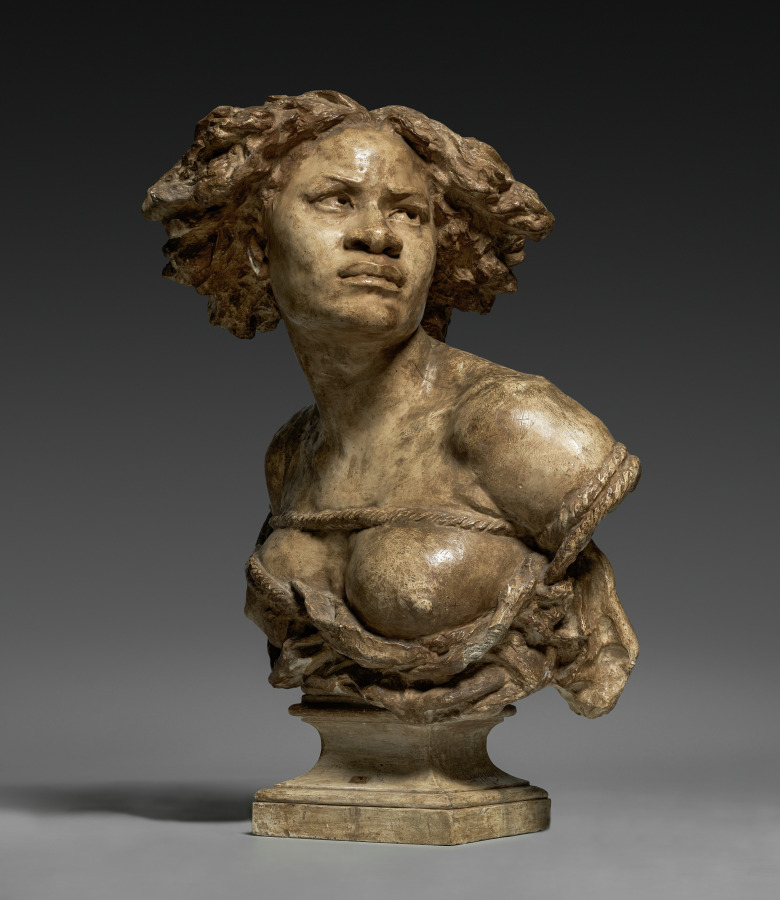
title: Why Born Enslaved!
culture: France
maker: Jean-Baptiste Carpeaux (French, 1827–1875)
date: 1867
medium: Plaster, original polychromed surface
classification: Sculpture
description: One of the most powerful expressions of abolitionist sentiment in the visual arts, Why Born Enslaved! depicts an African woman bound by ropes and looking defiantly upward. The ropes press painfully into her breasts; her torn blouse alludes to the violence responsible for her condition. The original, polychromed surface is covered with complex, nuanced hatchings and subtle modeling. Evidence indicates that this masterpiece of 19th-century French sculpture served as the master model for numerous casts in other museum collections.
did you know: Although officially abolished in France since 1848, slavery remained a hotly contested issue in Carpeaux’s time as it remained legal or tolerated in various countries around the world.